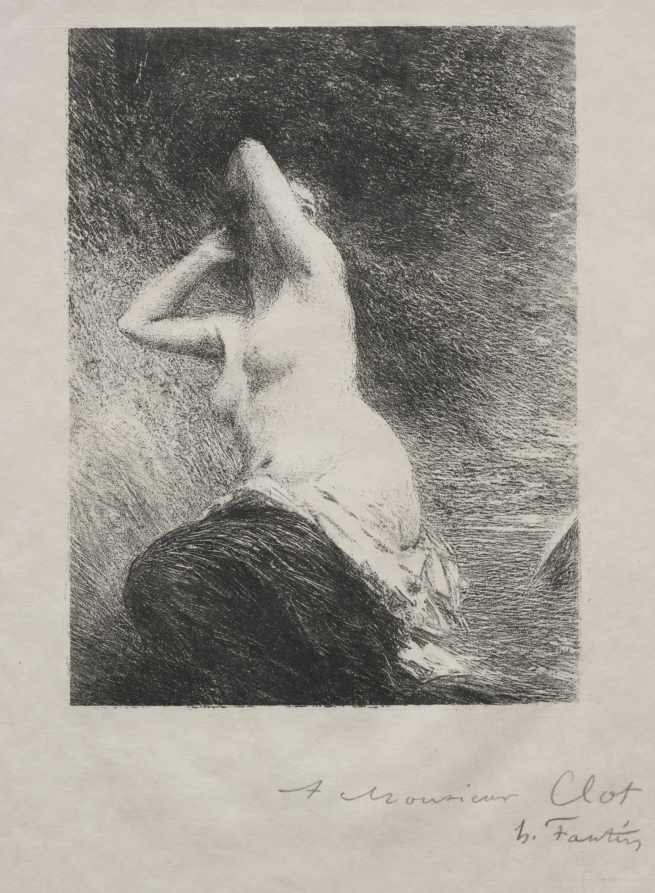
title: Ariadne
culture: France, early 20th Century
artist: Henri Fantin-Latour (French, 1836–1904)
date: 1900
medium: lithograph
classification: Print